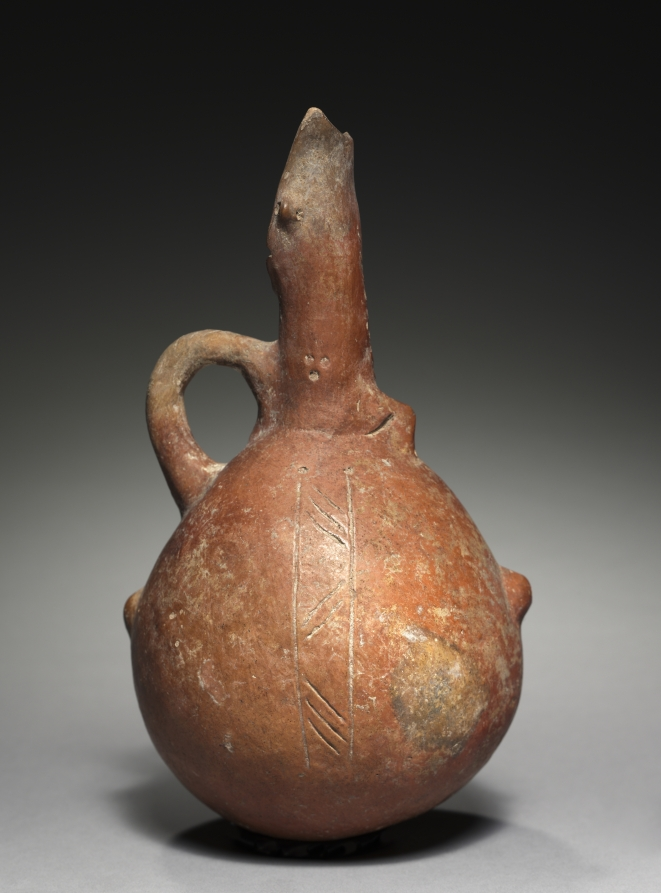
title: Jug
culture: Cyprus, early Cypriot III–middle Cypriot I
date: c. 2000–1800 BCE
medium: red ware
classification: Ceramic